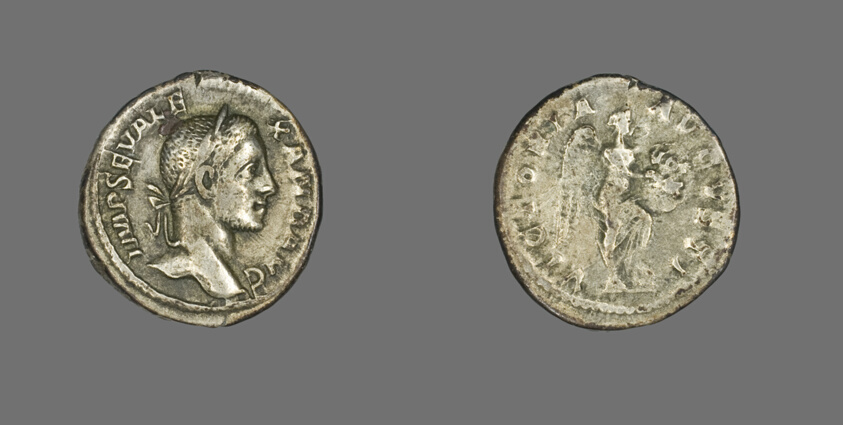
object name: Coin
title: Denarius (Coin) Portraying Emperor Severus Alexander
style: roman (ancient, style or period)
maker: Roman, minted in Rome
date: 228-231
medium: Silver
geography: Roman Empire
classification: coin; ancient art